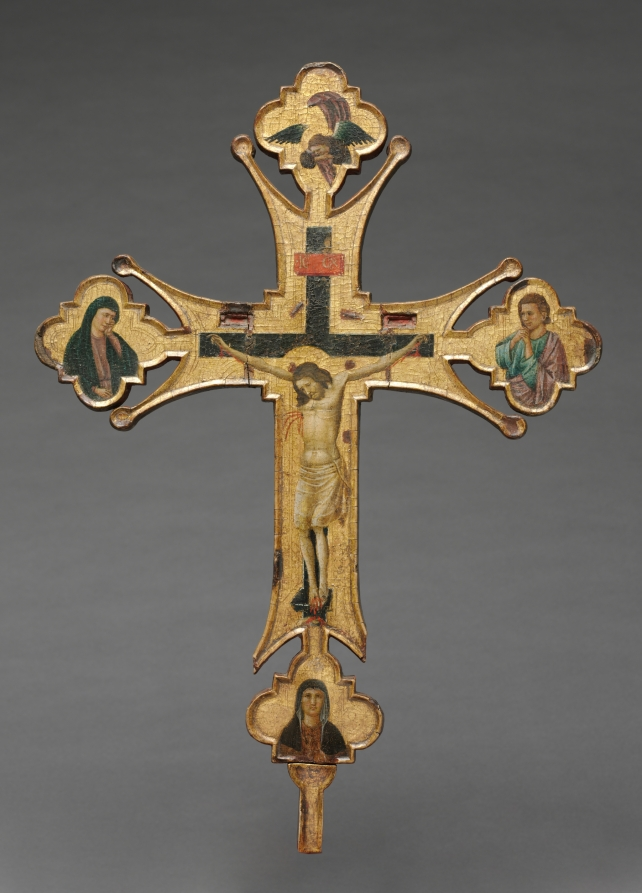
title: Processional Cross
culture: Italy, Umbria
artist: Master of Santa Chiara (Italian)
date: c. 1320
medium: oil on canvas on wood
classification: Painting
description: This cross was originally mounted on a tall pole and carried in religious processions. Therefore, the figures on each side are almost identical. In the center is Christ crucified. Looking on from the elaborate terminals at left and right are the Virgin and Saint John. The bottom terminal shows a different saint on each side: Saint Francis on one and Saint Clare on the other. At the top of each side is an angel. Although one angel looks up and the other down, both express intense grief in their faces and gestures. The Master of Santa Chiara is the name given to this unknown artist who painted this and several other works in Assisi. In that city, Saint Francis founded an order of friars while Saint Clare established a counterpart for women called the Poor Clares. The presence of both saints on this cross suggests that it was made for one of Assisi's Franciscian institutions.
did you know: This cross is painted on both sides so that while being carried in a procession the images are visible to a crowd; both sides are not quite identical.